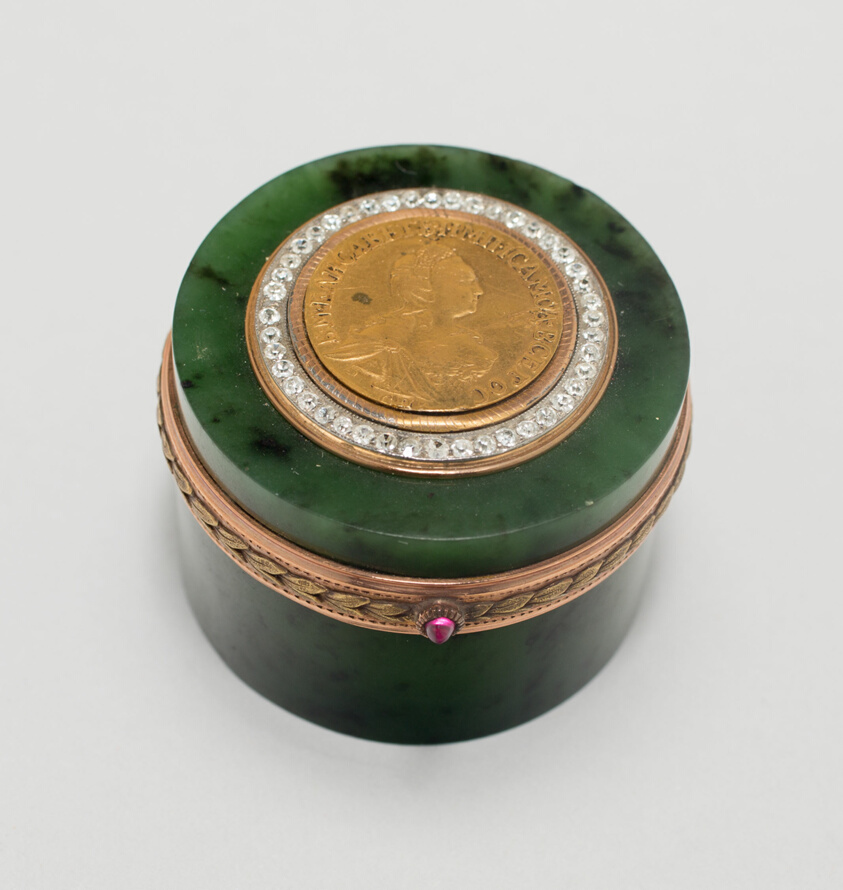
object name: Metalwork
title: Pillbox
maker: Fabergé Workshop; Saint Petersburg, Russia, 1842-1917; Master Craftsman: Michel Angelo Pergolesi; Italian, active 1777-1801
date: 1850/1900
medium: Jade and gold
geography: Saint Petersburg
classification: stone; miniature; european decorative arts; metalwork